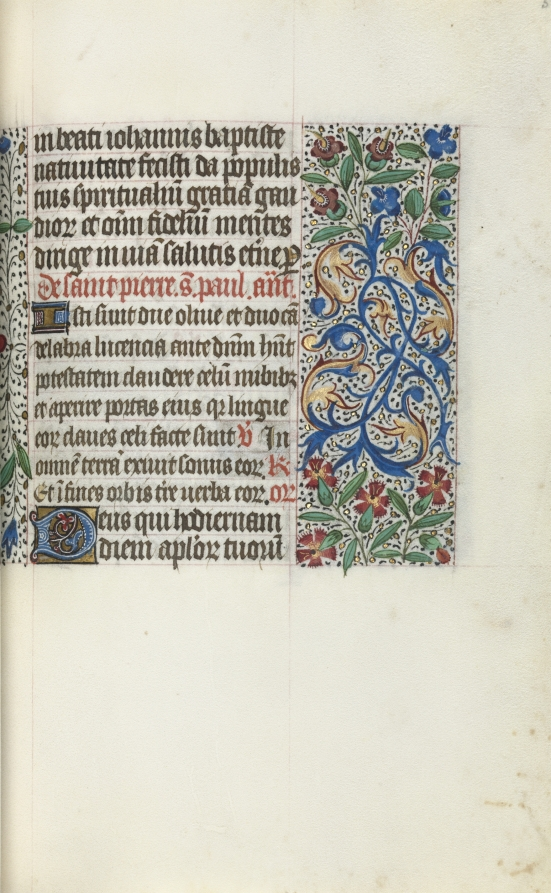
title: Book of Hours (Use of Rouen): fol. 51r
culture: France, Rouen, 15th century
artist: Master of the Geneva Latini (French, active Rouen, 1460–80)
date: c. 1470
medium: ink, tempera, and gold on vellum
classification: Bound Volume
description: In the late 1400s and early 1500s Rouen was an established and important center of book production. The city’s cathedral had a wealthy chapter that spent large sums of money to commission books and to maintain its extensive library. The stationers and booksellers would have likely been concentrated in or near the cathedral precinct. This artist, named after a manuscript now in Geneva, was Rouen’s principal illuminator during the second half of the 1400s.